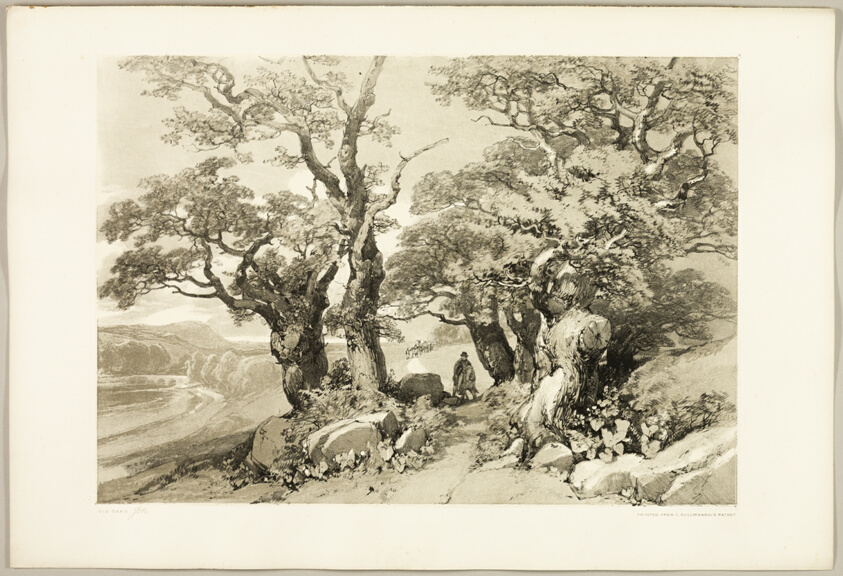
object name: Print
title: Old Oaks, from The Park and the Forest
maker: James Duffield Harding (English, 1798-1863); printed by Charles Joseph Hullmandel (English, 1789–1850); published by Thomas McLean (English, 1788–1875)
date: 1841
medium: Lithograph in black, with gray tint from a second plate, on ivory wove paper, laid down on ivory wove paper (chine collé)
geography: England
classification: lithograph; print; prints and drawing